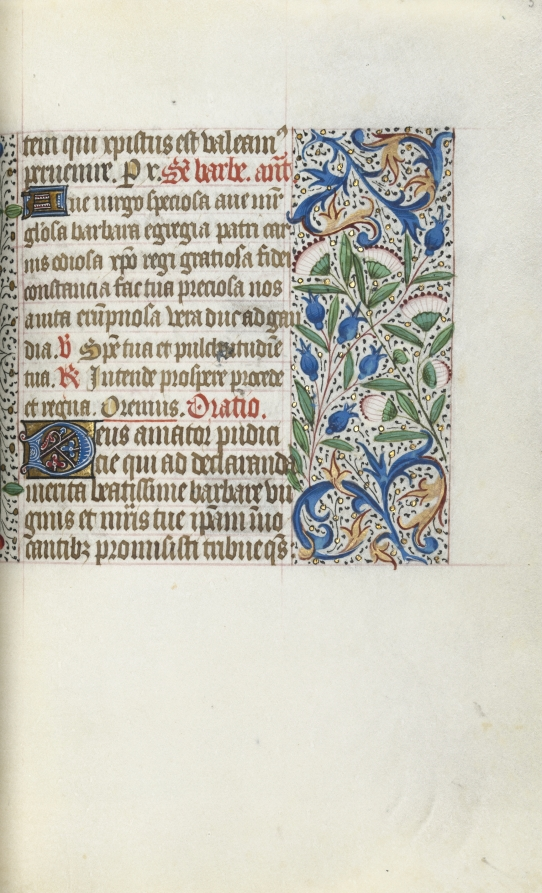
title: Book of Hours (Use of Rouen): fol. 54r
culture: France, Rouen, 15th century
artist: Master of the Geneva Latini (French, active Rouen, 1460–80)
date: c. 1470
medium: ink, tempera, and gold on vellum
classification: Bound Volume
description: In the late 1400s and early 1500s Rouen was an established and important center of book production. The city’s cathedral had a wealthy chapter that spent large sums of money to commission books and to maintain its extensive library. The stationers and booksellers would have likely been concentrated in or near the cathedral precinct. This artist, named after a manuscript now in Geneva, was Rouen’s principal illuminator during the second half of the 1400s.